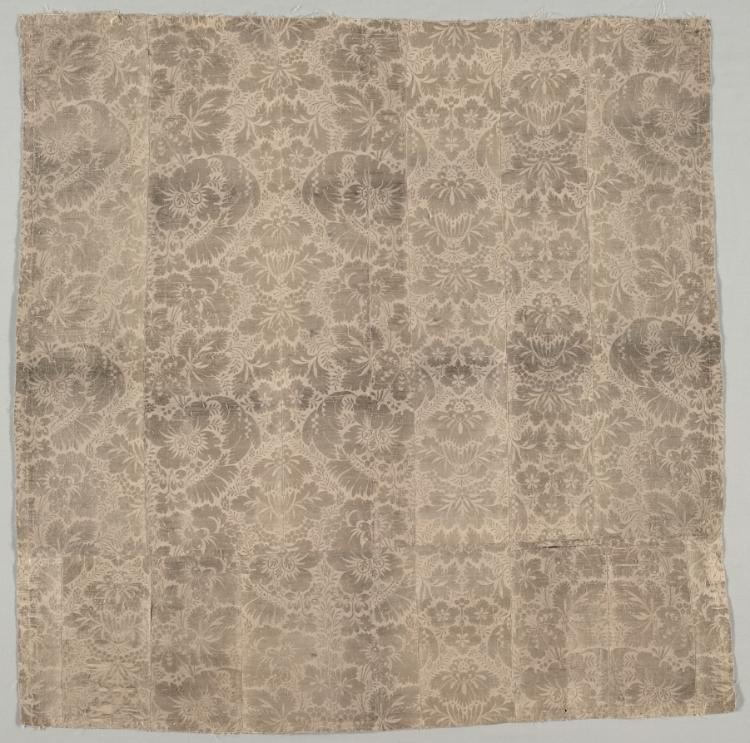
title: Panel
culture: France or Italy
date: early 1700s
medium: brocade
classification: Textile